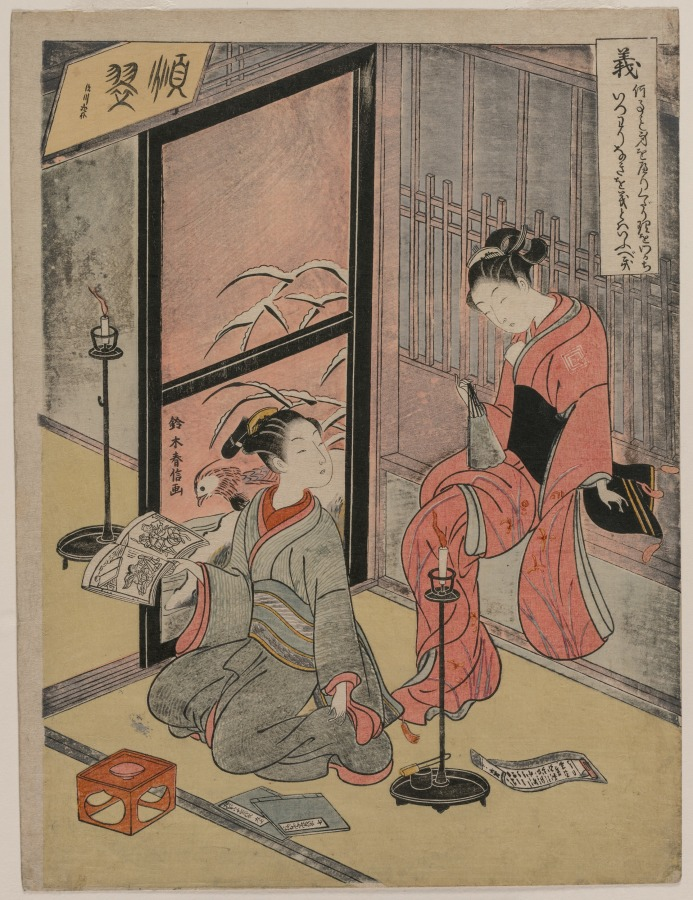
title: Righteousness, from The Five Virtues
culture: Japan, Edo period (1615–1868)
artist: Suzuki Harunobu (Japanese, 1724–1770)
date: 1767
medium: color woodblock print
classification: Print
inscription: 鈴木春信画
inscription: Nanigoto mo/ Mi o herikudari/ Ri o wakachi/ Itsuwari naki o/ Gi towa iu beki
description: Two young male courtesans enjoy reading in their quarters by candlelight. One holds an illustrated book recognizable as the drawing manual Illustrated Book of the Treasure-Bag of Sketches (絵本写宝袋), published in 1720 by Tachibana Morikuni (1679–1748). The poem at the top translates as follows: In all things to be humble, discern the path of reason, and abstain from falsehood. This is what we call righteousness.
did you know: The artist's signature is on the door painted with a mandarin drake in a snowy scene.